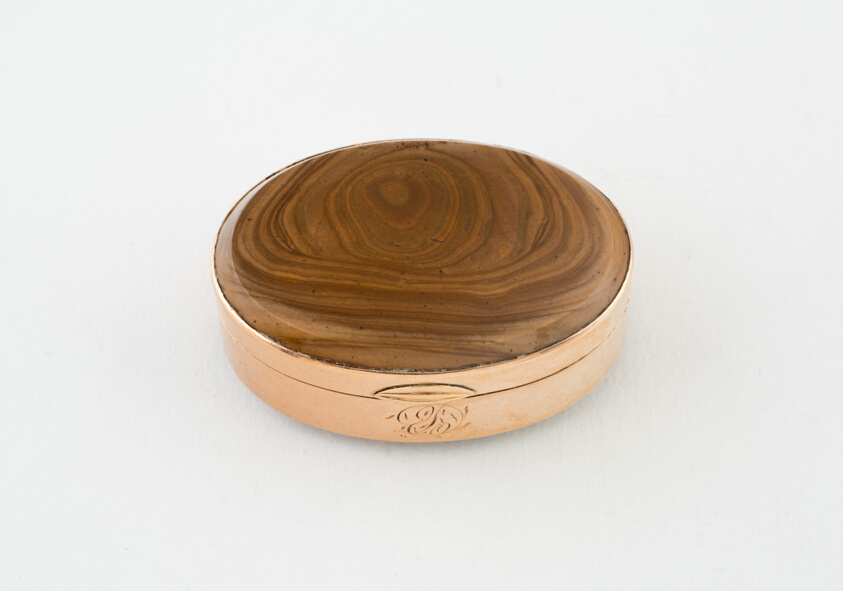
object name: Metalwork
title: Vinaigrette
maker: Possibly England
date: c. 1780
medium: Rose gold and agate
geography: England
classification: vinaigrette (container for health care); container for personal use; box; european decorative arts; metalwork; silver; decorative object/ornament